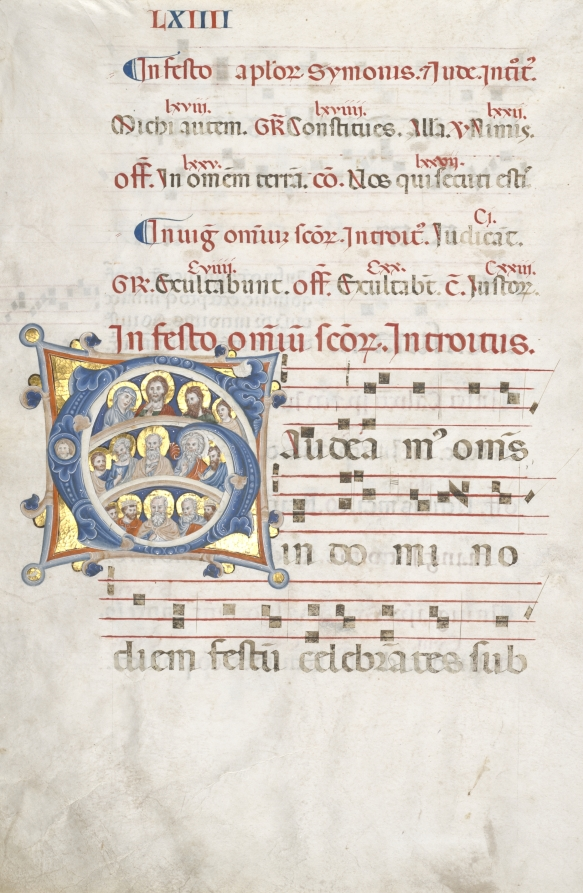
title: Bifolio from a Gradual: Initial (G) with Christ, the Virgin, and Apostles and Initial (O) (recto); Music and Text (verso)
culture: Italy, Siena(?)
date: c. 1300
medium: Ink, tempera, and gold on vellum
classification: Manuscript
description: The large decorated initial G introduces the text, Gaudeamus omnes in Domino (Let us rejoice in the Lord). It is the beginning of the opening prayer, or introit, of the Mass for the Feast of All Saints (November 1). The figures within the initial include Christ, the Virgin Mary, and various saints.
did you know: Words written in red ink, called rubrics, indicate titles and chapter headings that are not part of a manuscript’s main text.